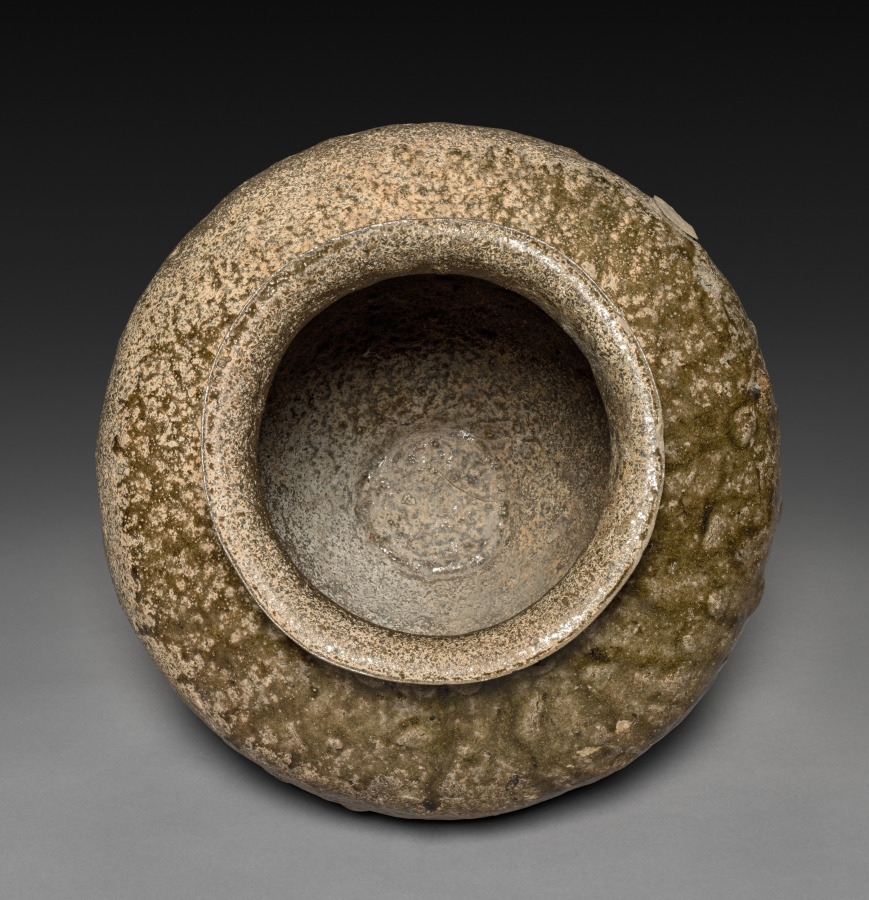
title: Storage Jar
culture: Japan, Kamakura period (1185–1333)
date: late 1100s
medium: Stoneware with natural ash glaze (Tokoname ware)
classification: Ceramic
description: Tokoname, located on Ise Bay in present-day Aichi prefecture on Japan’s main island, Honshu, was the largest center of ceramic production in medieval Japan. It had been an active center of ceramic production since the Heian period (794–1185). Wide-mouthed jars like this one are called kame, and were favored for use in tea practice.